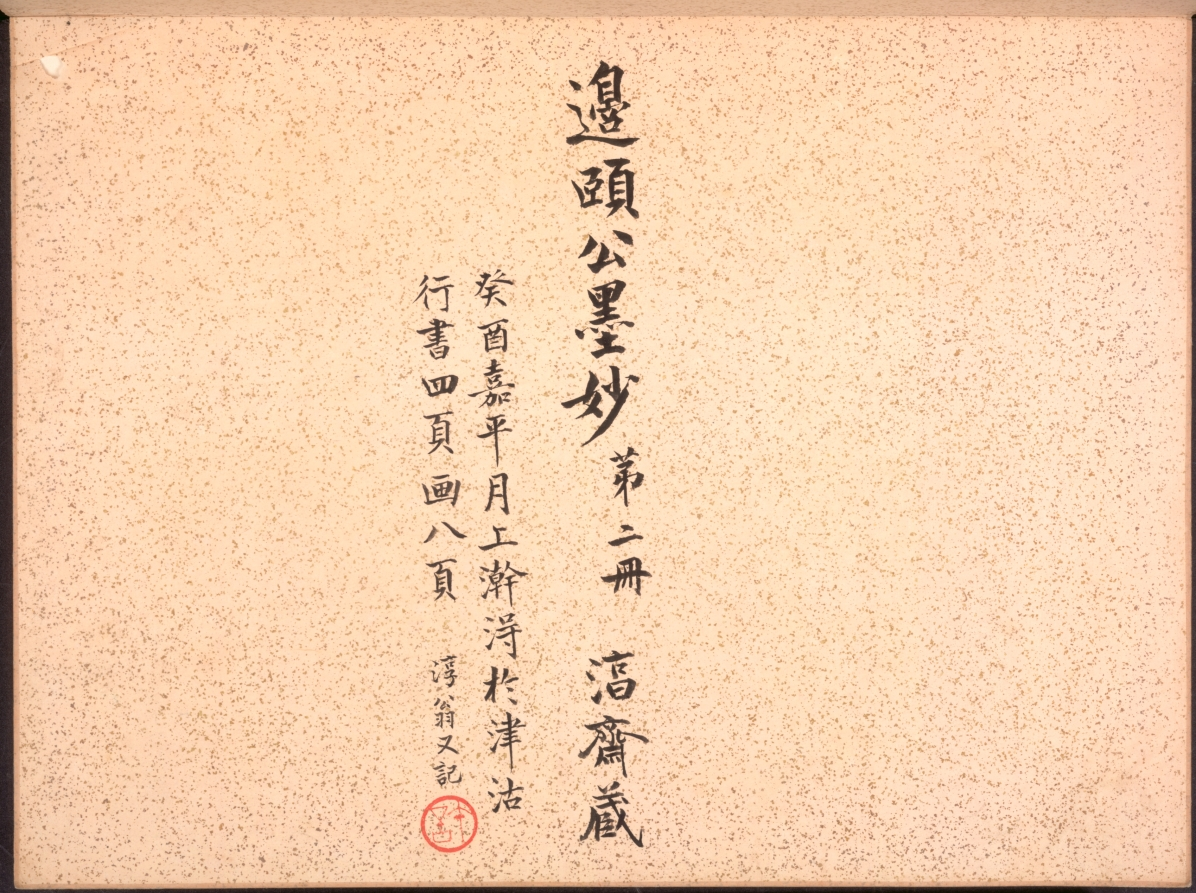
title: Album of Calligraphy and Paintings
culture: China, Qing dynasty (1644-1911)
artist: Bian Shoumin (Chinese, 1684–1752)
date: first half of the 1700s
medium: album leaf; ink and color on paper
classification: Painting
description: The artist Bian Shoumin is known for his depiction of wild geese, water, and reeds. The migrant birds in autumn and winter evoked, in the minds of the Chinese intelligentsia, a time of parting and sorrow.